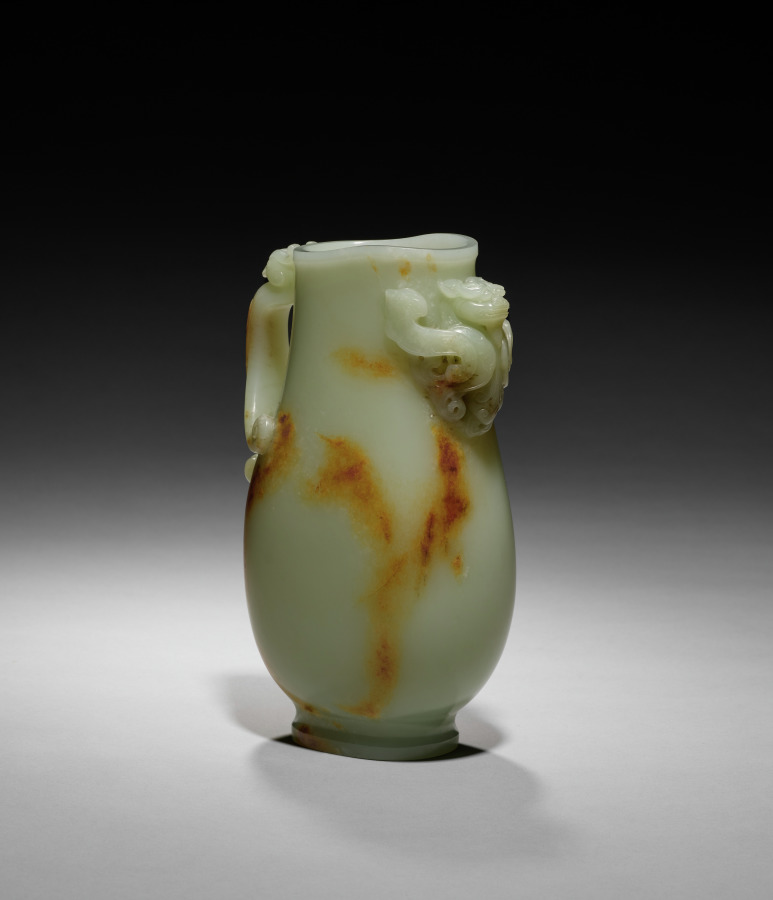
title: Pitcher (Gong) with Dragon and Bird-Headed Handle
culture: China, Qing dynasty (1644–1911)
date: 1700s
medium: pale greenish-white jade with brown markings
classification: Jade